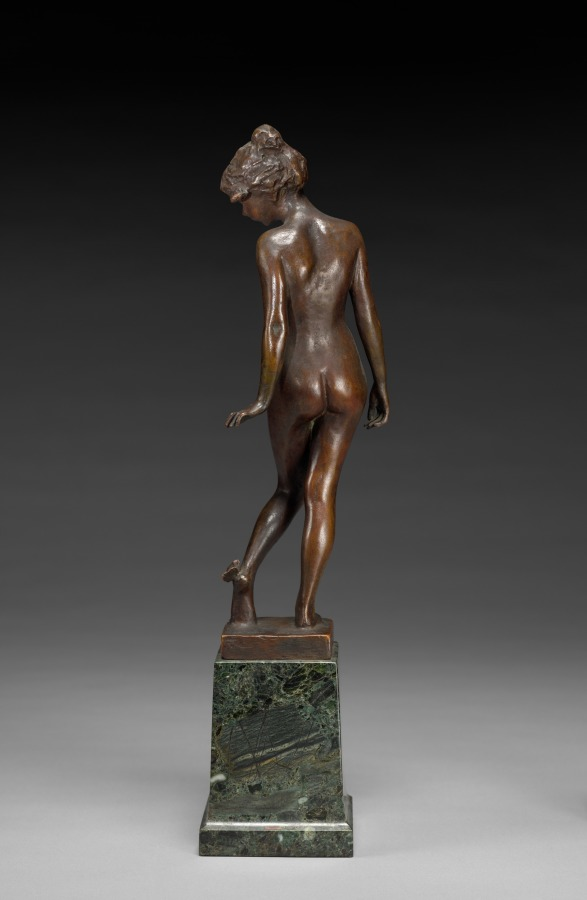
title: Butterfly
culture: America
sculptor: Emil Fuchs (American, born Austria, 1866–1929)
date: c. 1919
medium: bronze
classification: Sculpture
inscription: Signed on base: EMIL FUCHS